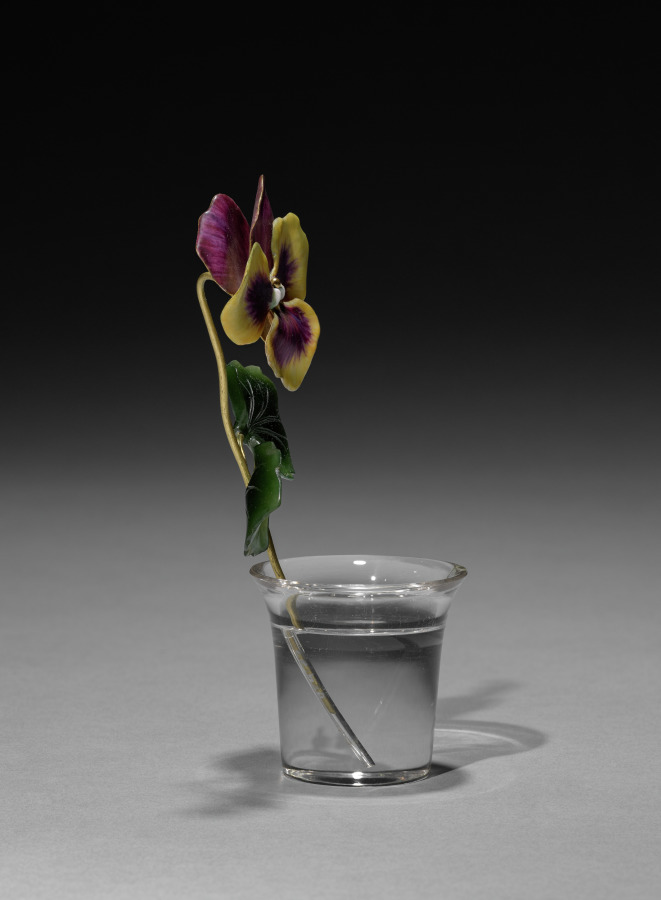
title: Flower Study of a Pansy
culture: Russia, St. Petersburg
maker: House of Fabergé (Russian, 1842–1918)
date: c. 1885–1915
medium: gold, jade, enamel, rock crystal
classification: Miscellaneous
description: This flower study depicts a pansy in bloom. Fabergé’s inspiration for his flower studies is said to have come from the floral brooches of precious stones that were made in the 1700s for Catherine the Great as well as from the Japanese art of flower arranging, known as ikebana. Small and delicate, Fabergé’s flower studies were given as intimate gifts to friends by the tsarina and others in the court. She also liked to take them around to wherever the imperial family was residing as a reminder of spring during the harsh Russian winters.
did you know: The stems of Fabergé’s flower studies are set into little basins carved from rock crystal to resemble pots of water.